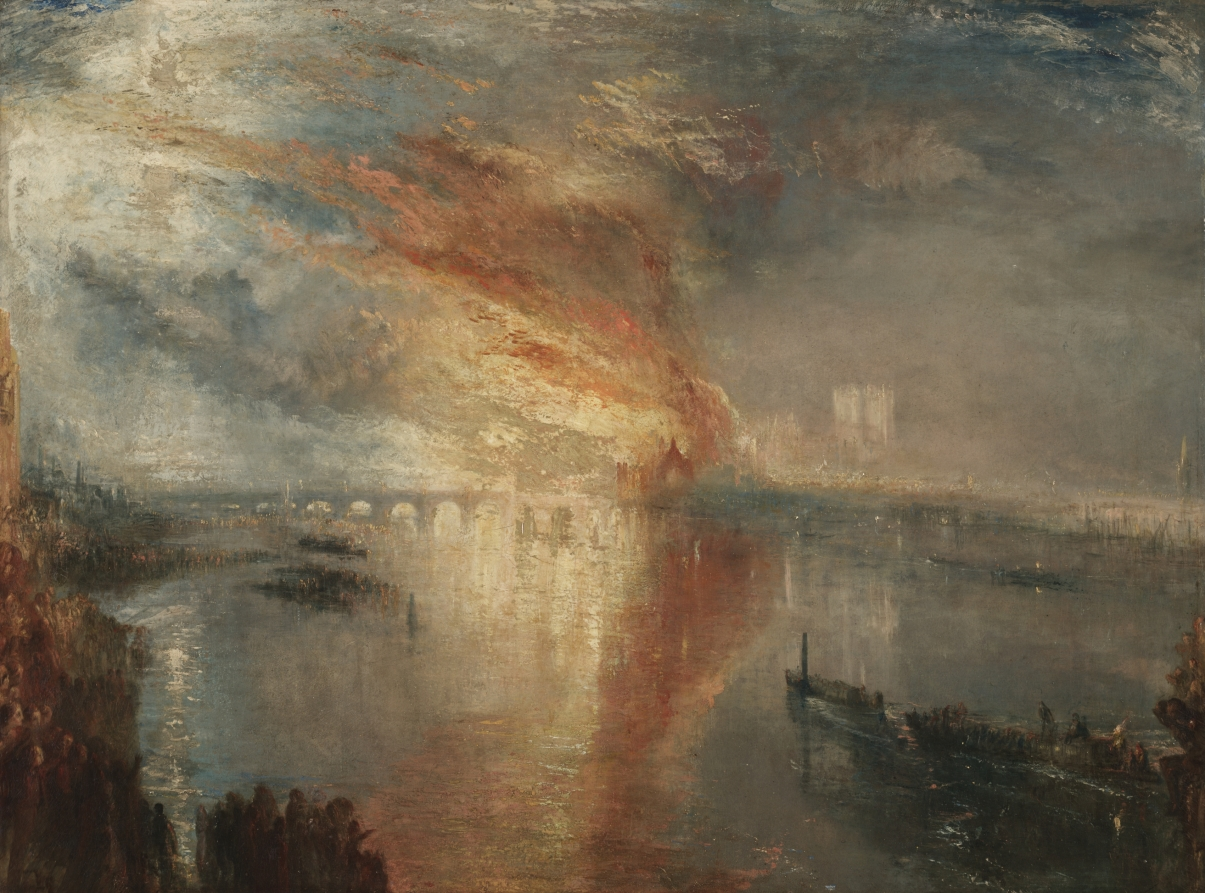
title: The Burning of the Houses of Lords and Commons, 16 October 1834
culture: England, 19th century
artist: Joseph Mallord William Turner (British, 1775–1851)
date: 1835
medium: oil on canvas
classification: Painting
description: Fire consumed London’s famous Houses of Parliament on the night of October 16, 1834, and people gathered along the banks of the river Thames to gaze in awe at the horrifying spectacle. Initially, a low tide made it difficult to pump water to land and hampered steamers towing firefighting equipment along the river. The blaze burned uncontrollably for hours. J. M. W. Turner records the struggle as the boats in the lower-right corner head toward the flames. Although Turner based the painting on an actual event, he magnified the height of the flames, using the disaster as the starting point to express man’s helplessness when confronted with the destructive powers of nature. Brilliant swathes of color and variable atmospheric effects border on abstraction.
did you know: Turner painted two versions of this event. Cleveland's painting views the fire downriver, from the southeast bank of the Thames, while the second version at the Philadelphia Museum of Art views the fire from directly across Westminster Bridge.